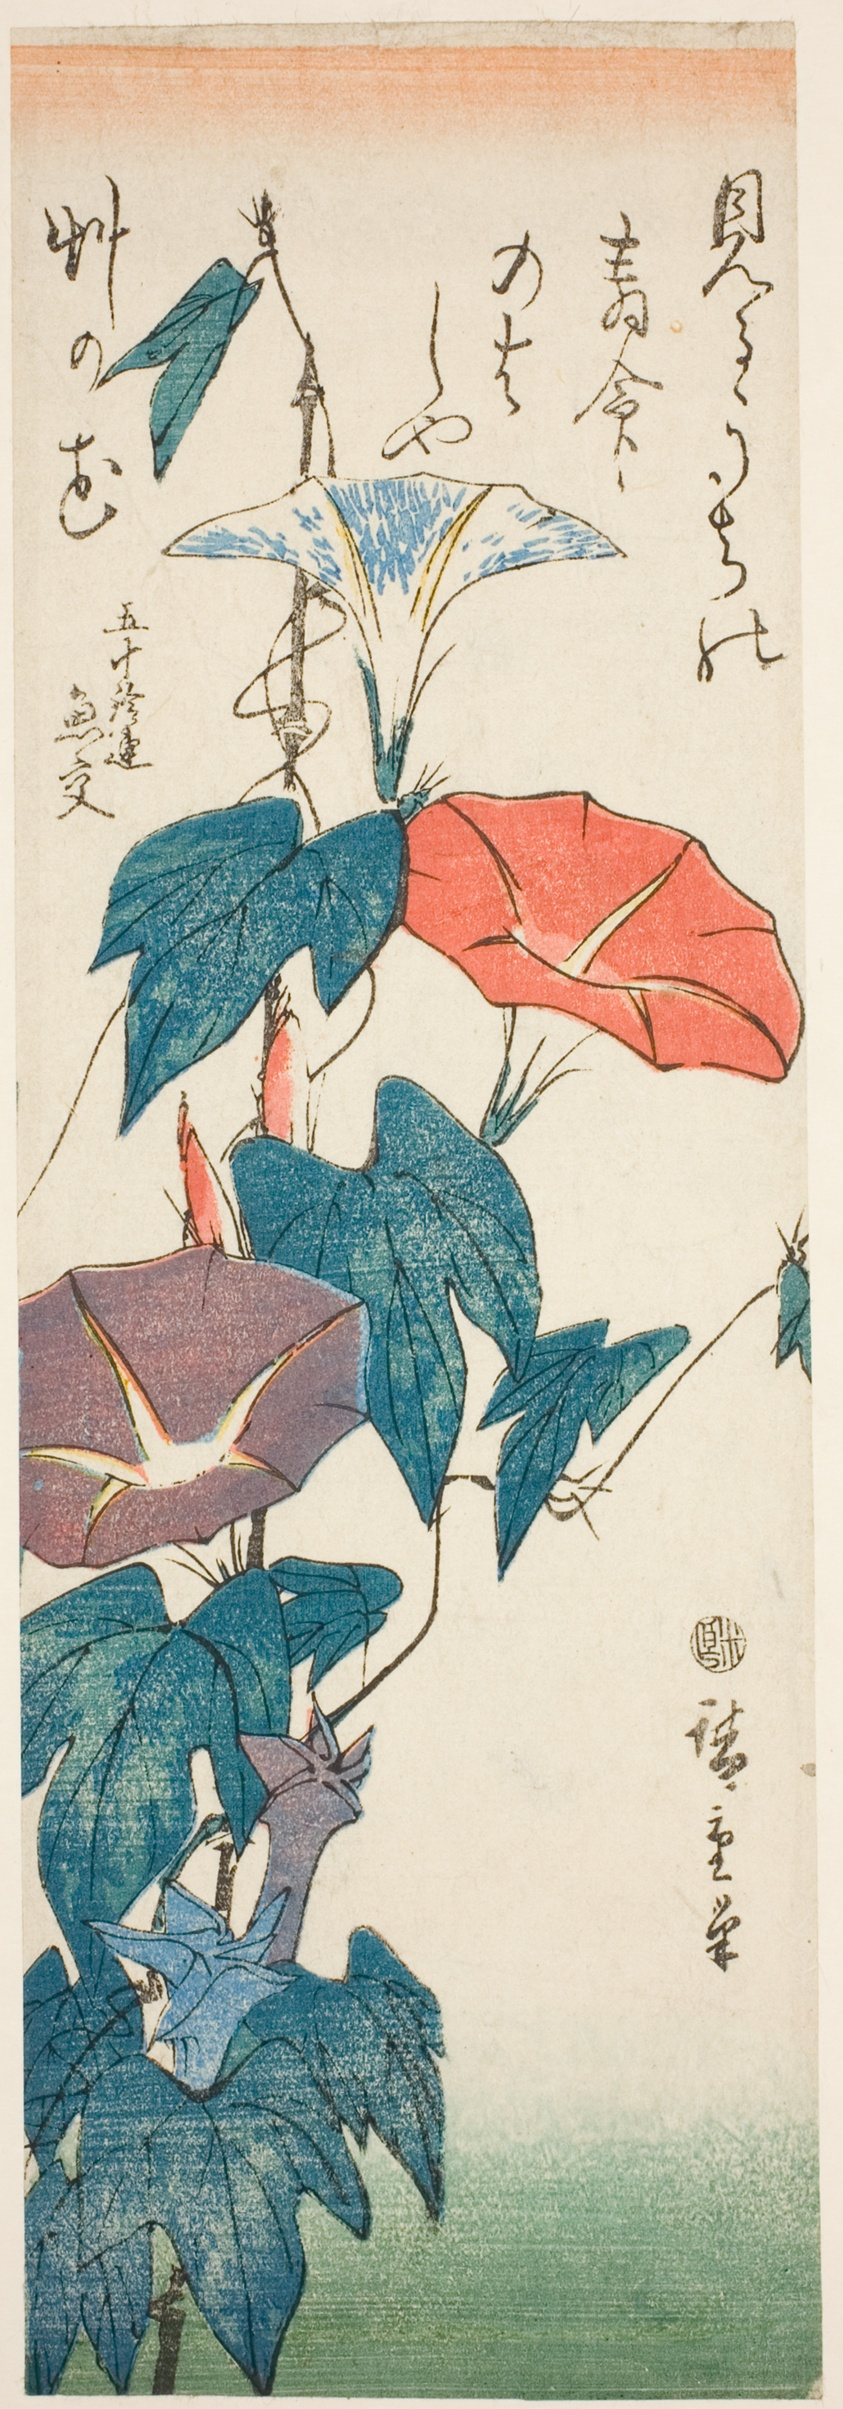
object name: Print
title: Morning Glories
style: Japanese (culture or style)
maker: Utagawa Hiroshige 歌川 広重; Japanese, 1797-1858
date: c. 1840s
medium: Color woodblock print; tanzaku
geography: Japan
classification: woodblock print; print; asian art